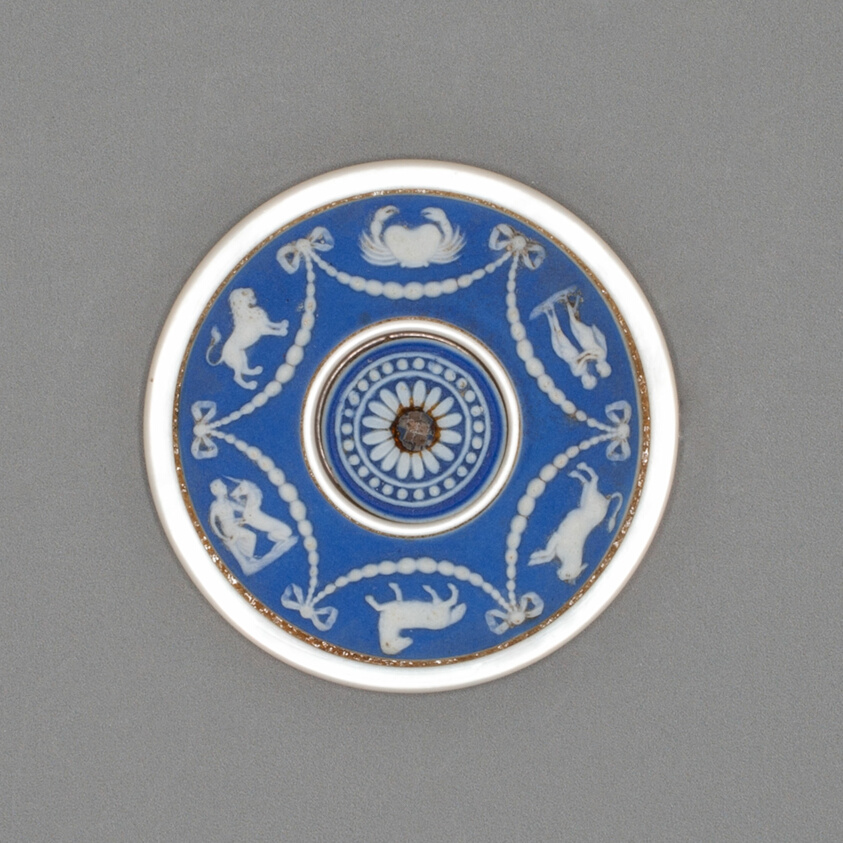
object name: Ceramics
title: Button with Signs of the Zodiac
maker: Wedgwood Manufactory (England, founded 1759)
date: Late 18th century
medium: Stoneware (jasperware)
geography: Burslem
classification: accessories (object genre); stoneware; european decorative arts; ceramics